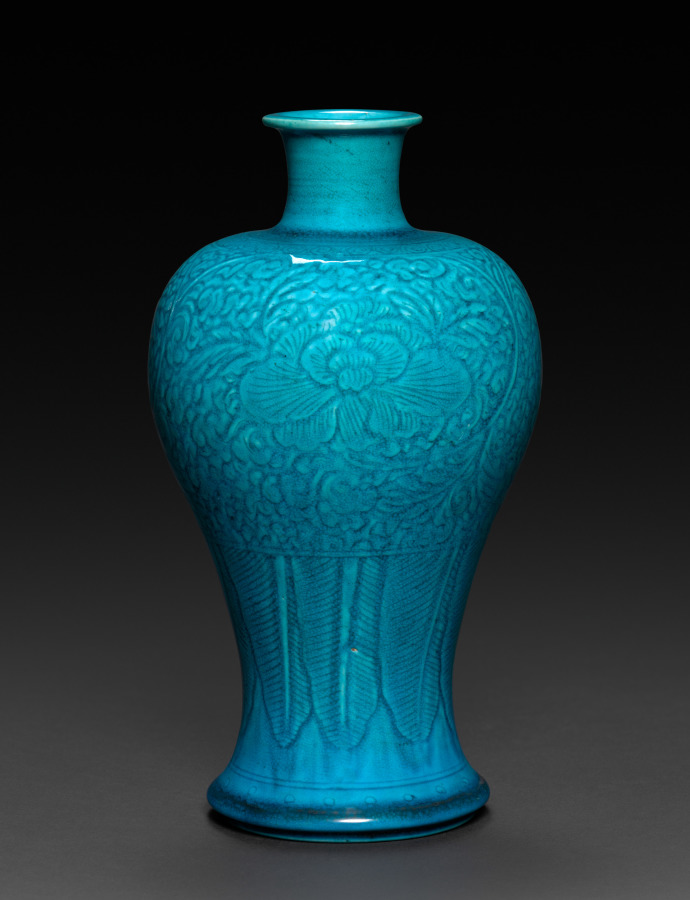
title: Vase with peacock blue glaze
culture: China, Qing dynasty (1644-1911), Kangxi reign (1661-1722)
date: 1662–1722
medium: porcelain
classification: Ceramic